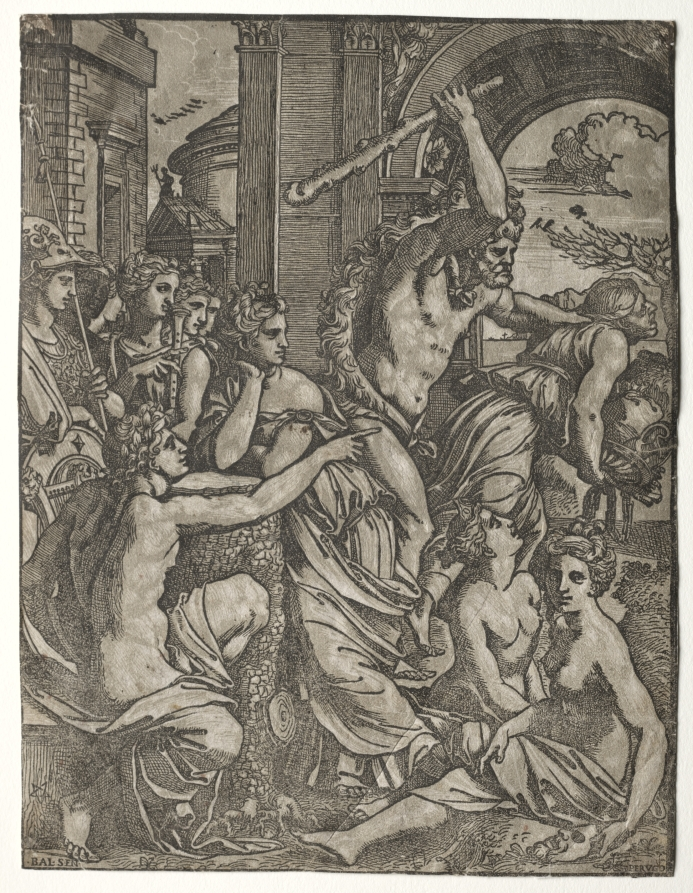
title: Hercules Driving Envy from the Temple of the Muses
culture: Italy, 16th century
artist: Ugo da Carpi (Italian, c. 1479–c. 1532)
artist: after Balthasar Peruzzi (Italian, 1481–1536)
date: 1522–24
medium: chiaroscuro woodcut (in black and gray)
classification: Print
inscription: lower left, in block: ·BAL·SEN·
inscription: lower right, in block: PERVGO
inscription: verso, upper right, in pen and brown ink: 2--6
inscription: lower right, in graphite: WO / 2119 / V[underlined] L4[?]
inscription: lower right, pen and brown ink: B[the remainder of the word is illegible]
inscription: scattered across sheet, graphite and pen and brown ink: [illegible marks]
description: The term chiaroscuro combines the Italian words chiaro (light) and scuro (dark). Invented to emulate drawings with light and dark pigments on tinted paper, the printing technique uses multiple woodblocks to layer different tones of color. Here, Ugo da Carpi—the progenitor of the chiaroscuro woodcut in Italy—used two blocks in black and gray on a beige paper. In this allegory, not linked to a particular myth, Hercules applies his brute force in the service of art and knowledge. Pointing toward the archway, Apollo banishes the vice of Avarice from the Temple of the Muses. A personification of greed, Avarice carries a hoard of treasure in her arms as Hercules, a character of virtuous strength, chases her out. Apollo sits next to the war goddess Athena, identified by her helmet, shield, and spear. Here she represents wisdom, and fulfills a civilizing role as patroness of the arts.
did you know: There are two versions of the Hercules Driving Envy from the Temple of the Muses composition. The CMA chiaroscuro woodcut corresponds to version B, in which figures are modeled using less cross-hatching and more highlights in tone blocks.